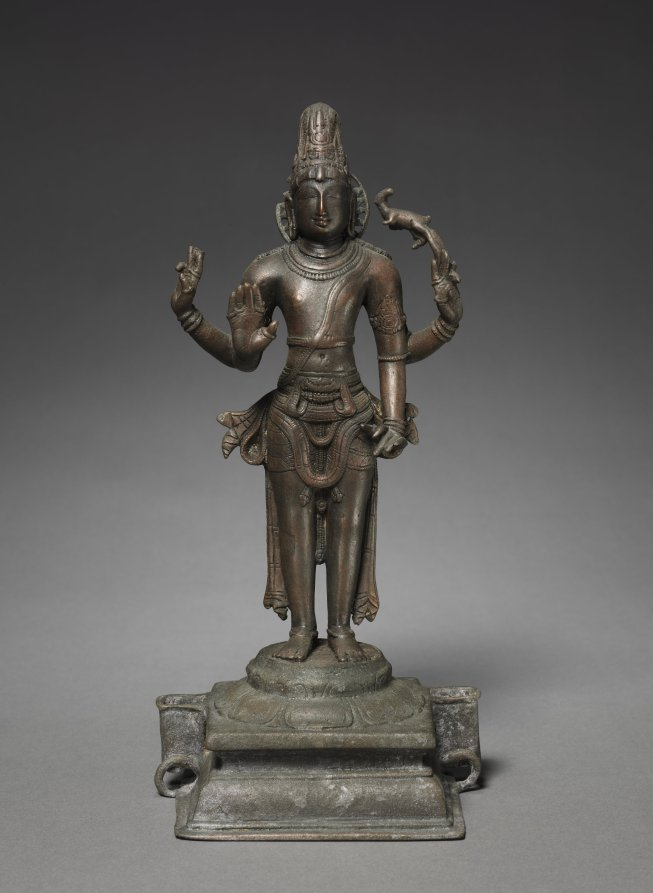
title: Shiva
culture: South India, Chola period (900–1200s)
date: 1200s–1300s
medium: bronze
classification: Sculpture